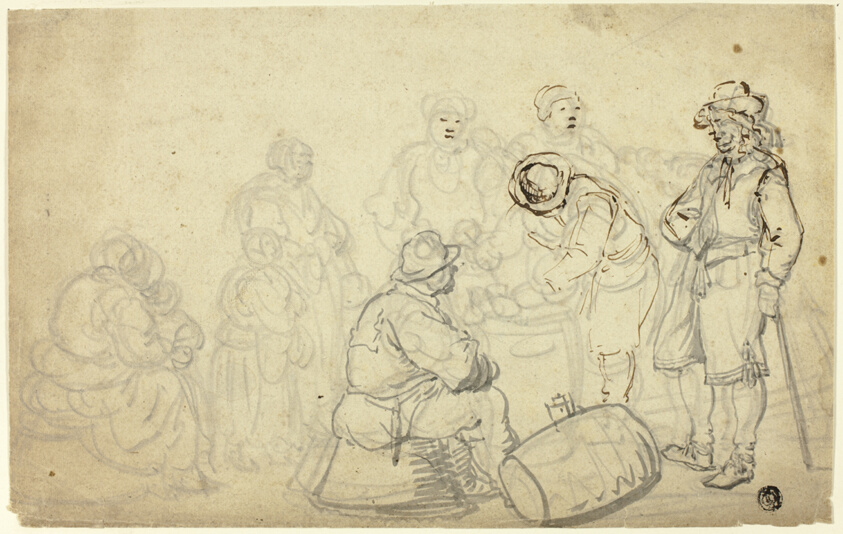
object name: Drawing and Watercolor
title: Peasant Scene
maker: Attributed to Willem van de Velde, I (Dutch, c. 1611-1693); or Simon de Vlieger (Dutch, c. 1600-1653)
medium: Pen and brown ink, and brush and gray ink, over graphite, on ivory laid paper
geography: Flanders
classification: pen and ink drawings; drawings (visual works); prints and drawing